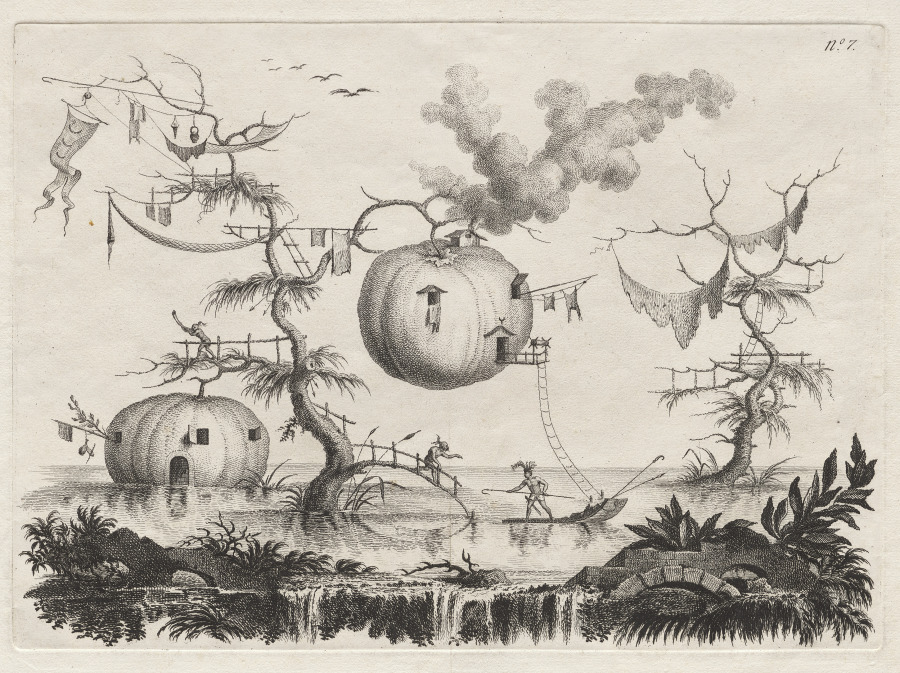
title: Pumpkins Used as Dwellings to Be Secure against Wild Beasts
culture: Italy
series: Suite of the Most Notable Things Seen by John Wilkins Erudite English Bishop during His Famous Voyage from the Earth to the Moon … dedicated to Sir William Hamilton ambassador to the Court of Naples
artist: Filippo Morghen (Italian, 1730–after 1807)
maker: possibly after Jean-Pierre-Louis-Laurent Hoüel (French, 1735–1813)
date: about 1769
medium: etching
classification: Print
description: Filippo Morghen’s set of 10 etchings is outstanding among visual narratives of imaginary voyages to the moon, both visual and literary, that intrigued 18th-century European audiences. A title page and nine plates depict the imagined lives and economy of moon dwellers. These include modes of transport such as large birds and sailboats propelled by giant bellows, enormous scissors for capturing wild beasts (including an oversized rat), and the use of giant pumpkins as fishing boats and as dwellings. Representations of the moon dwellers are based on inaccurate and imaginary European interpretations of Asian, Ottoman, and Native American cultures—called chinoiserie and turquerie—that permeated the decorative and visual arts of the period.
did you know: Morghen based this print series on three books dedicated to moon exploration, including Bishop Francis Godwin’s The Man in the Moone (1640).